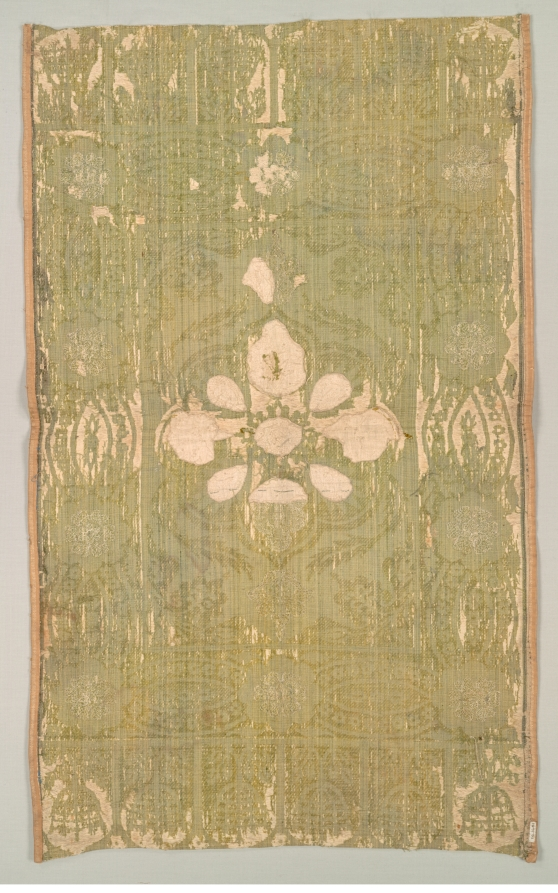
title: Velvet cushion cover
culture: Turkey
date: 1600s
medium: velvet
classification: Velvet